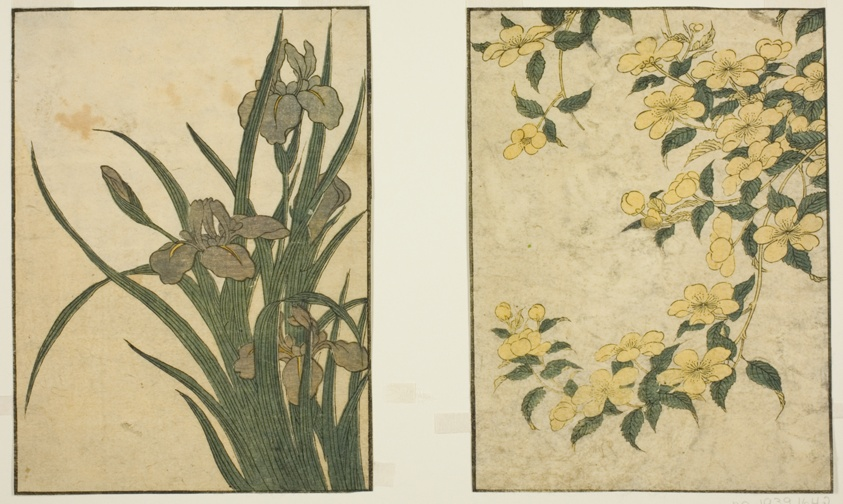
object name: Print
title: Kerria and Iris, from the illustrated book "Picture Book: Flowers of the Four Seasons (Ehon shiki no hana)," vol. 1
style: Japanese (culture or style)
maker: Kitagawa Utamaro 喜多川 歌麿; Japanese, 1753 (?)-1806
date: New Year, 1801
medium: Color woodblock print; 2 pages from illustrated book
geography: Japan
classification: woodblock print; print; asian art